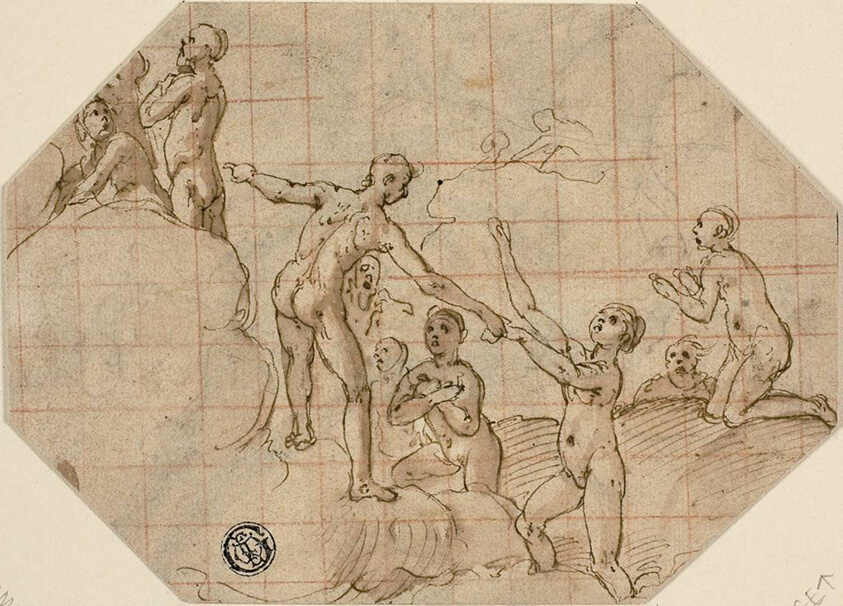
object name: Drawing and Watercolor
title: Group of Blessed Souls: Study for the Last Judgment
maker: Federico Zuccaro (Italian, 1540/41-1609)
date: 1576/79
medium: Pen and brown ink with brush and brown wash, with traces of black chalk and pale blue wash, on ivory laid paper, squared in red chalk, laid down on ivory laid paper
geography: Italy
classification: ink with wash; drawings (visual works); prints and drawing